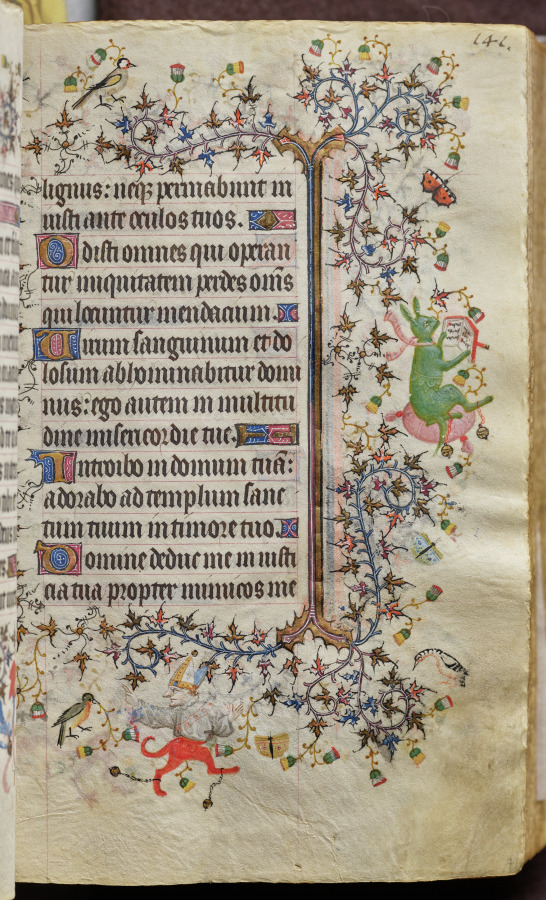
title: Hours of Charles the Noble, King of Navarre (1361-1425): fol. 71r, Text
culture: France, Paris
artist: Master of the Brussels Initials and Associates (French)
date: c. 1405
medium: ink, tempera, and gold on vellum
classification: Bound Volume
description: This precious volume was obviously highly prized by its owner, the French-born King of Navarre, who had his coat of arms painted on no less than twenty folios. Rather than directly commissioning this manuscript from a specific workshop, it seems that Charles the Noble acquired his book of hours -- perhaps ready-made for the luxury market -- while on a trip to Paris in 1404-05. A collaborative effort, six painting styles are evidenced within the pages of this codex, those of two Italians, two Frenchmen, and two Netherlanders. The painter who was responsible for the planning and decoration of the book, and who produced seventeen of the large miniatures, was a Bolognese artist known as the Master of the Brussels Initials. His principal assistant, responsible for most of the borders, was a Florentine who signed his name "Zecho" da Firenze on folio 208 verso.